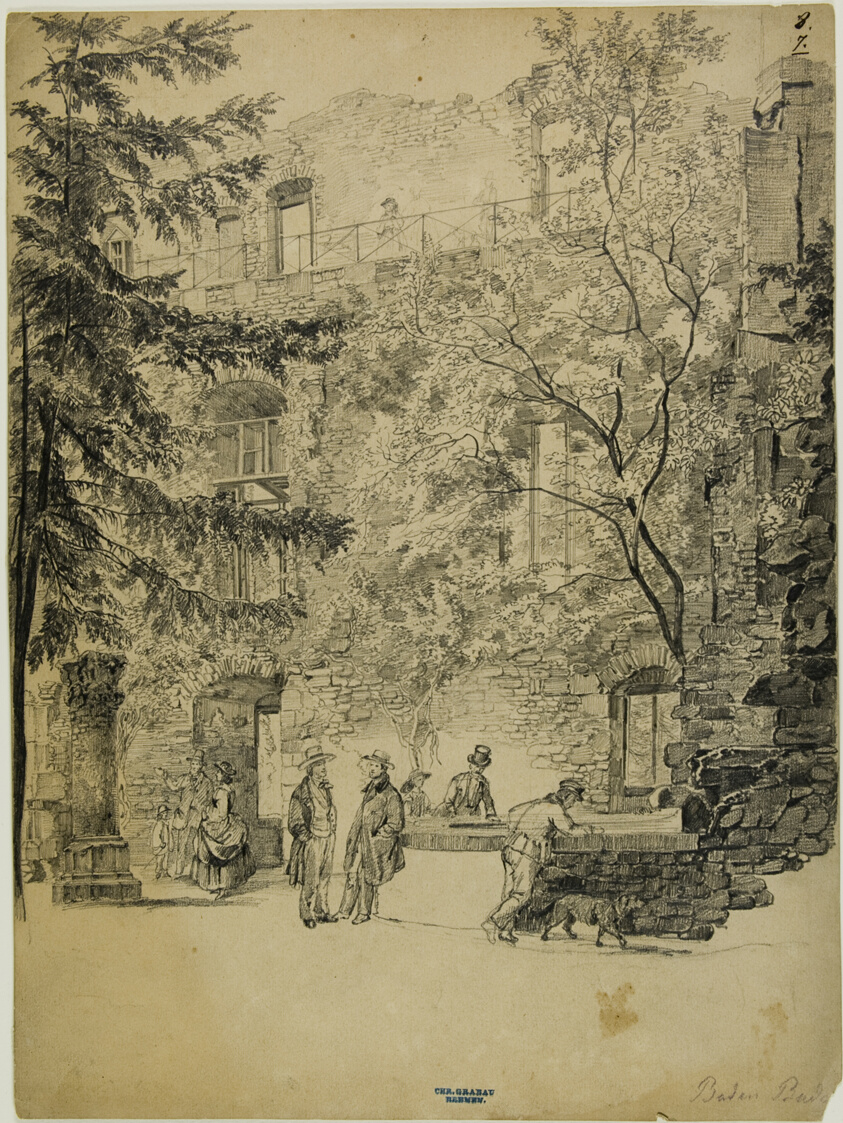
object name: Drawing and Watercolor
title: Baden-Baden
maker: Christian Grabau (German, 1810-1874)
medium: Graphite on tan wove paper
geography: Germany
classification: graphite; drawings (visual works); prints and drawing